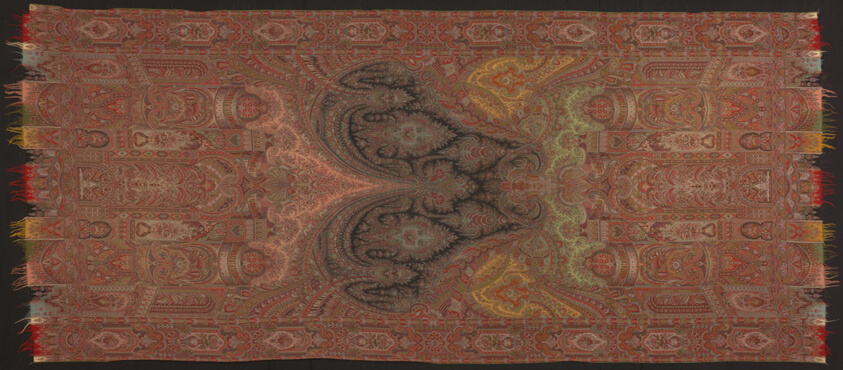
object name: Costume and Accessories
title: Shawl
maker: Probably designed by Anthony Berrus; French, 1815–1883; France, probably Paris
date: c. 1855/62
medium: Silk and wool, twill weave with supplementary patterning wefts bound in twill interlacings; main warp fringe; woven on a loom with a Jacquard attachment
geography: France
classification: weaving; textile; costume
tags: fountains, urns